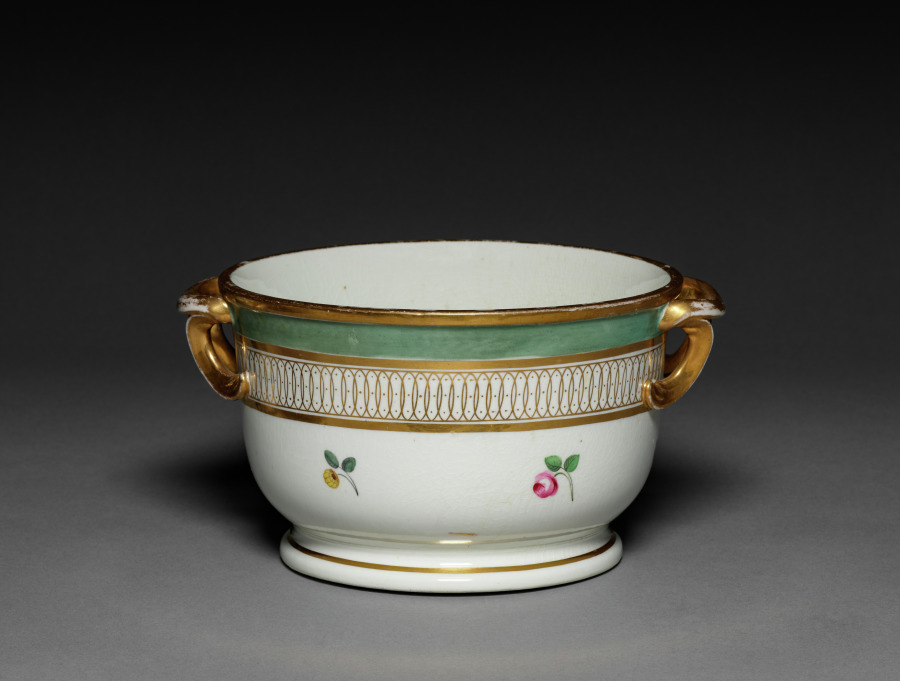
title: Ice Pail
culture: England, Derby, 18th-19th century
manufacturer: Derby (Crown Derby Period) (British)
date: c. 1795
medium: porcelain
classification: Ceramic